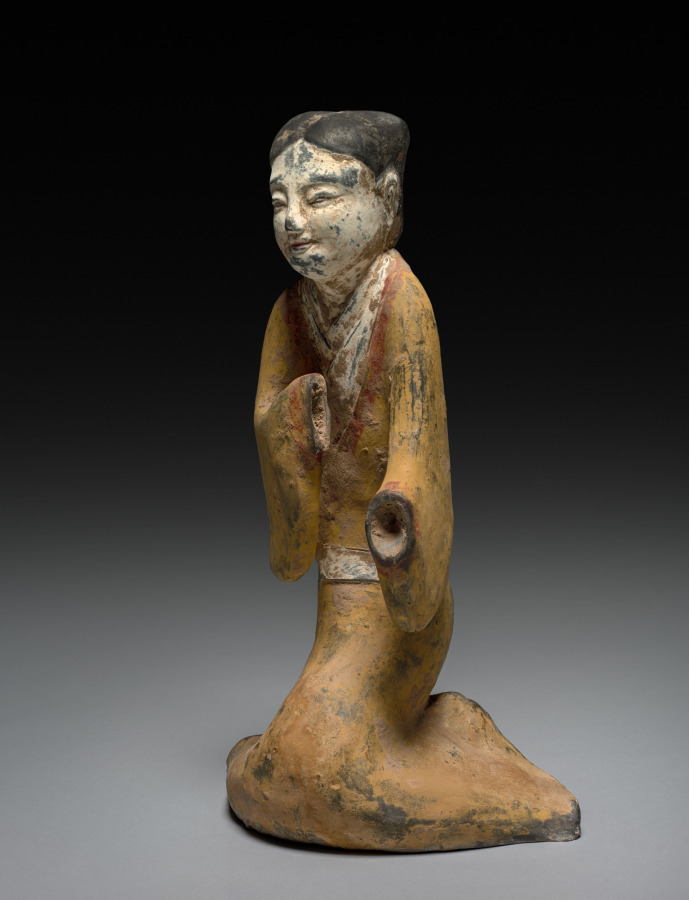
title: Kneeling Woman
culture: China, Western Han dynasty (206 BCE–8 CE) to Eastern Han dynasty (25–220 CE)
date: 100 BCE–100 CE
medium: painted earthenware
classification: Sculpture